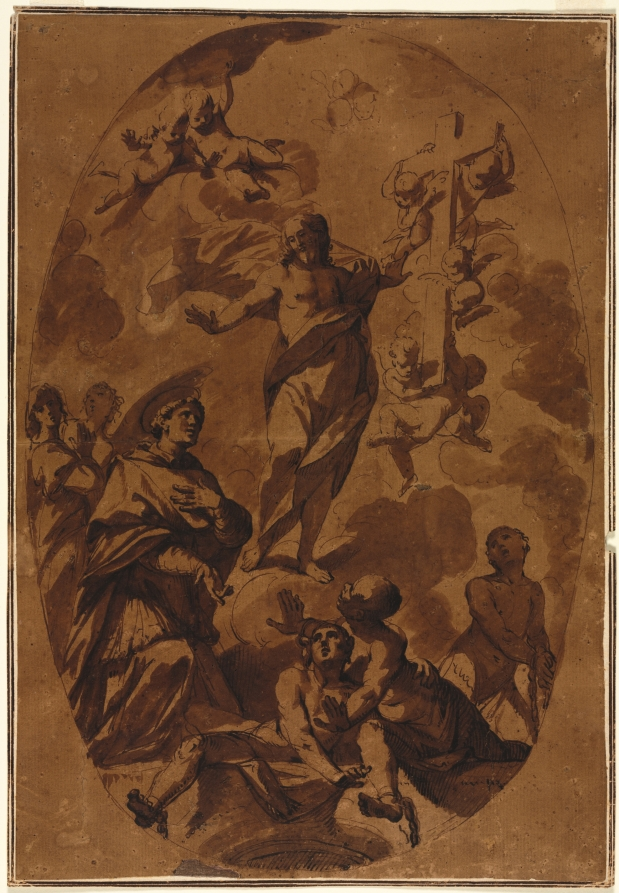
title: Christ Triumphant Appearing to an Interceding Saint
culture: Italy, Bologna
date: 1600s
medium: pen and brown ink and brush and brown wash; framing lines in brown ink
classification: Drawing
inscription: VERSO OF SECONDARY SUPPORT, upper right, in graphite: 125°° [crossed out] ; lower center, in graphite: S. Ricci ; lower right, in graphite: no Scholz ; lower left, in graphite: 100°° ; lower right, in graphite: [no?] 20 ; lower right, in graphite: Sebastiano Ricci